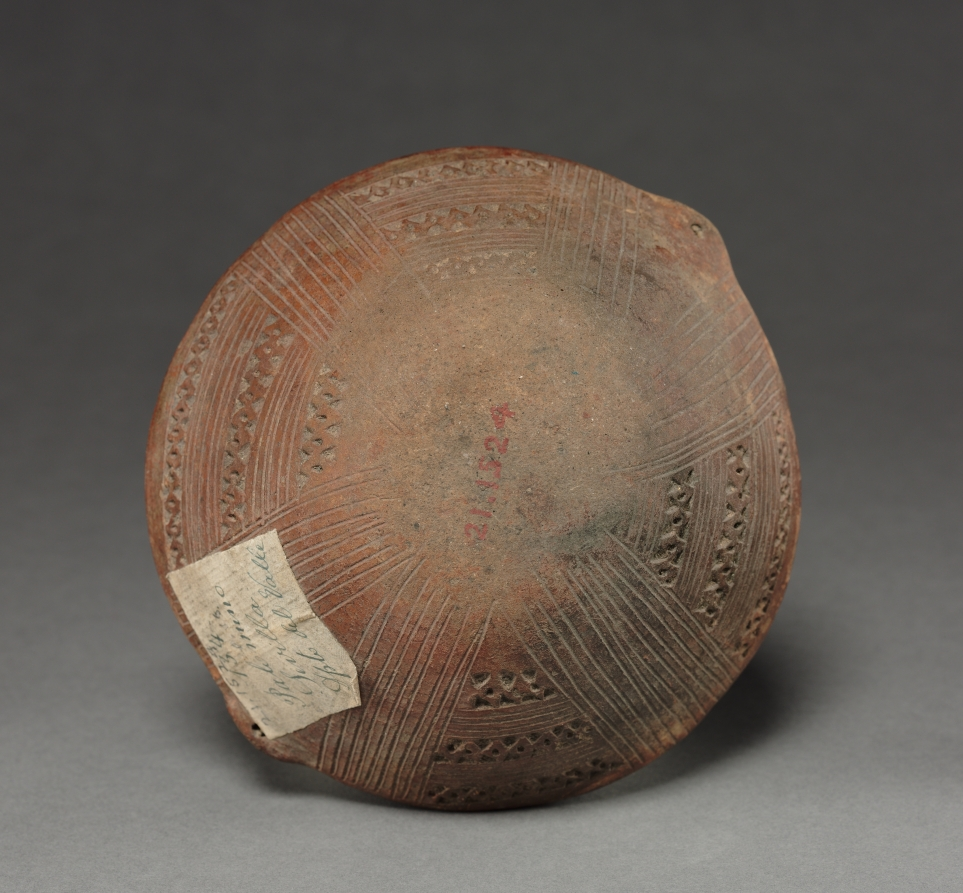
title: Jar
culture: Colombia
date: before 1550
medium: red ware with incised patterns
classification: Ceramic